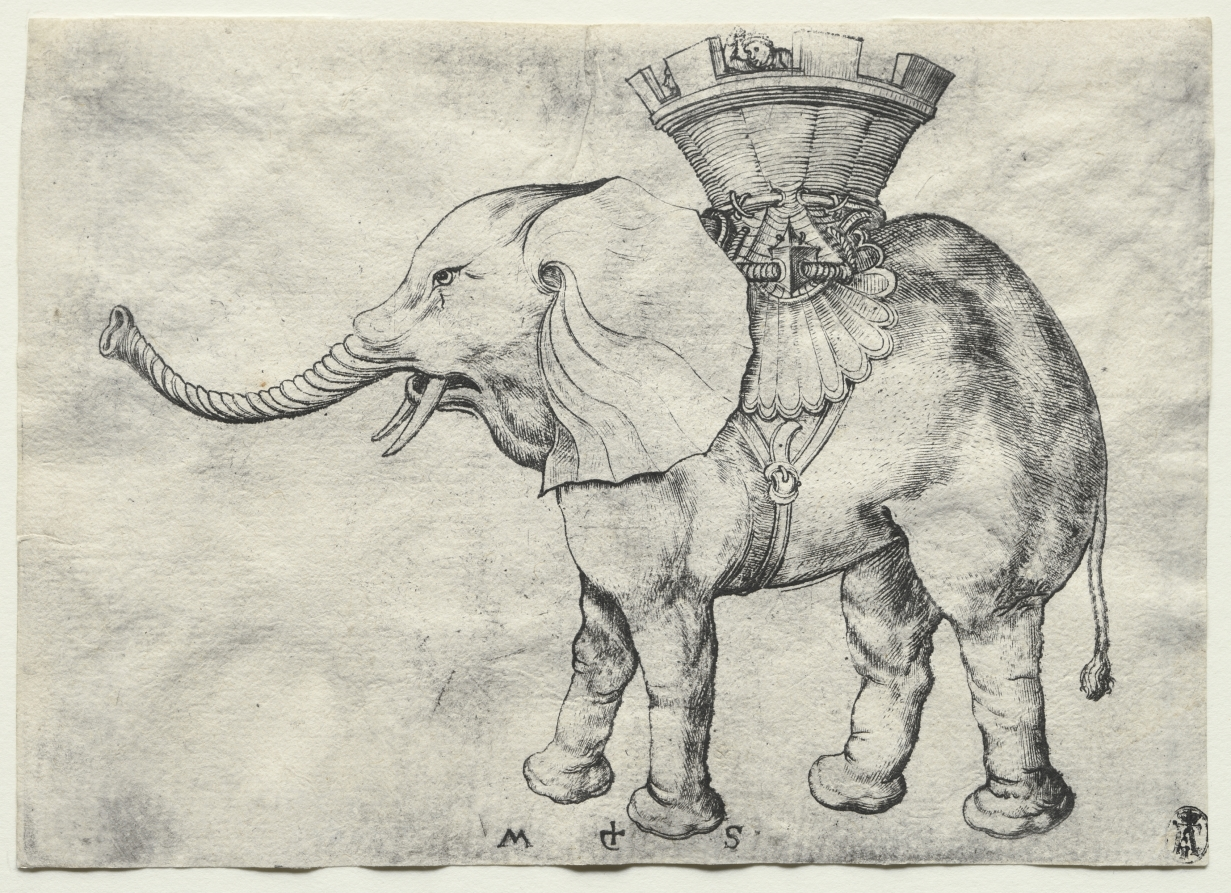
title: An Elephant with Howdah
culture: Germany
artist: Martin Schongauer (German, c. 1450–1491)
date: c. 1485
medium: engraving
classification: Print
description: This print shows an elephant carrying a crenellated and fortified basket—the howdah—from which two very small human figures peer out. In 1483, an elephant was brought to Germany and taken from town to town to be exhibited as a curiosity. It is likely that Martin Schongauer and his brother Ludwig, who were living in Ulm at that time, witnessed the arrival of this exotic animal. While he may have seen the elephant in person, Schongauer's portrayal—with its twisted trunk and shell-like ear—was likely made from memory rather than direct study of the beast.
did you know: The howdah is a carriage placed on the back of an elephant and used to transport wealthy people during hunting and warfare.